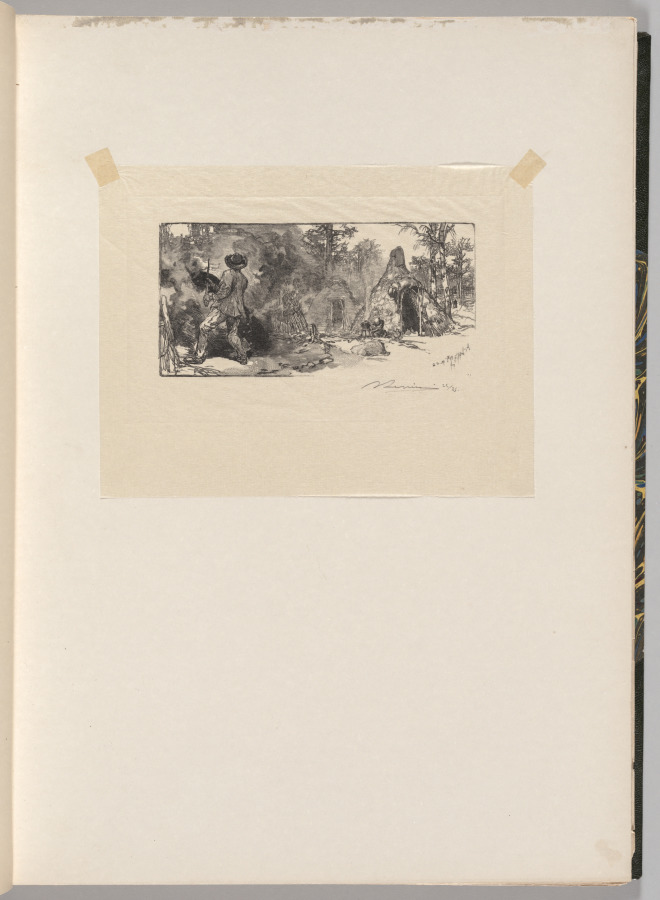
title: Fontainebleau Forest: Coalmen (La Forêt de Fontainebleau: Les Charbonniers)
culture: France, 19th century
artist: Auguste Louis Lepère (French, 1849–1918)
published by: A. Desmoulins, Published in Revue Illustrée, 1887–90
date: 1890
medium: wood engraving from bound volume of 34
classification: Bound Volume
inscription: Below image, lower right, in black ink: ALepère 22/35; on window mat, lower right, in graphite: Les Charbonniers; in block, within image, lower right: 26.g789 (undecipherable numbers) A